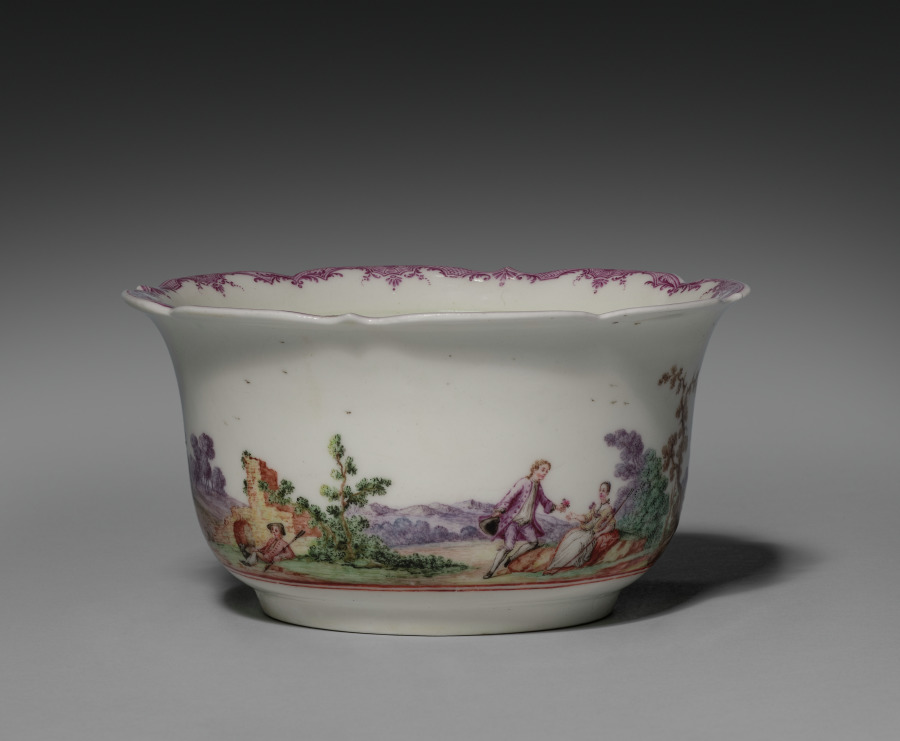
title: Sugar Bowl (Sucrier)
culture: France, Vincennes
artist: Sèvres Porcelain Factory (French, est. 1756)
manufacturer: Vincennes Porcelain Factory (France, 1740–56)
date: 1745–48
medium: soft-paste porcelain with enamel decoration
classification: Ceramic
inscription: in red: P.M.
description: This covered bowl is one of the earliest surviving examples of Vincennes porcelain. Its decorations, particularly the lacy borders, show the influence of Meissen porcelain, but an individual note is struck in the extreme delicacy and colorful restraint of the painting of the landscape scenes.